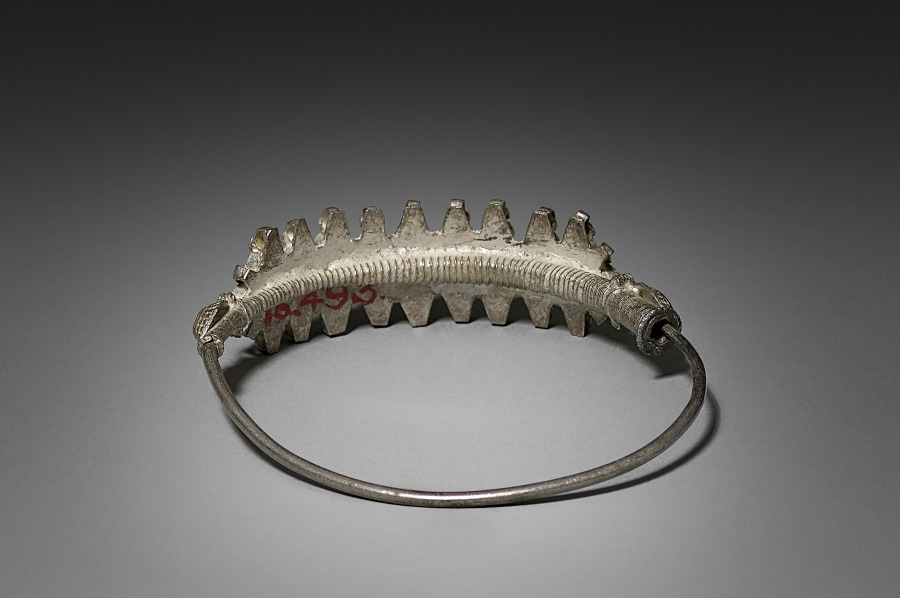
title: Nose Ring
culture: India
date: early 1900s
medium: silver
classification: Jewelry